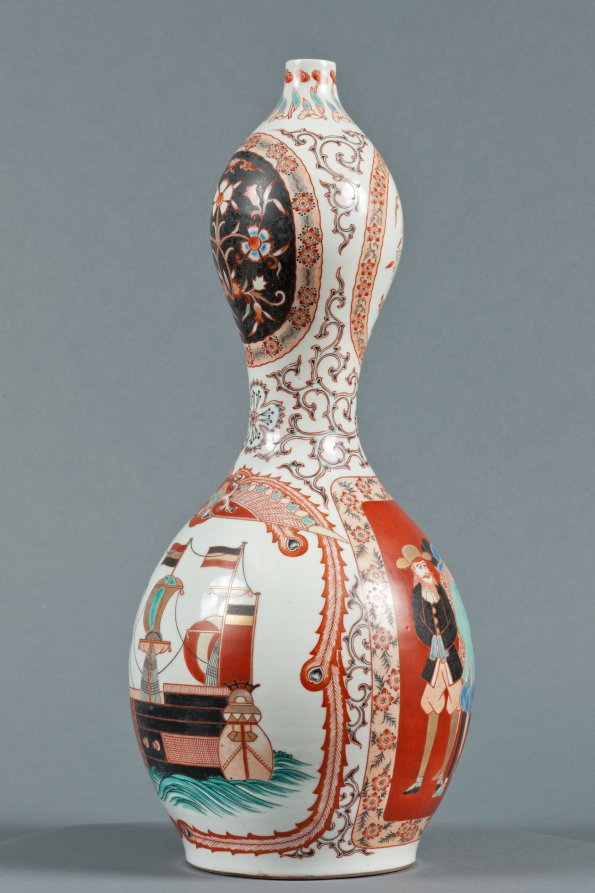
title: Bottle with Western Ships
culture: Japan, Edo period (1615–1868)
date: c. 1800–1868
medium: Porcelain with decoration in colored enamels and underglaze blue, overglaze enamels, and gold (Hizen ware, Arita type)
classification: Ceramic